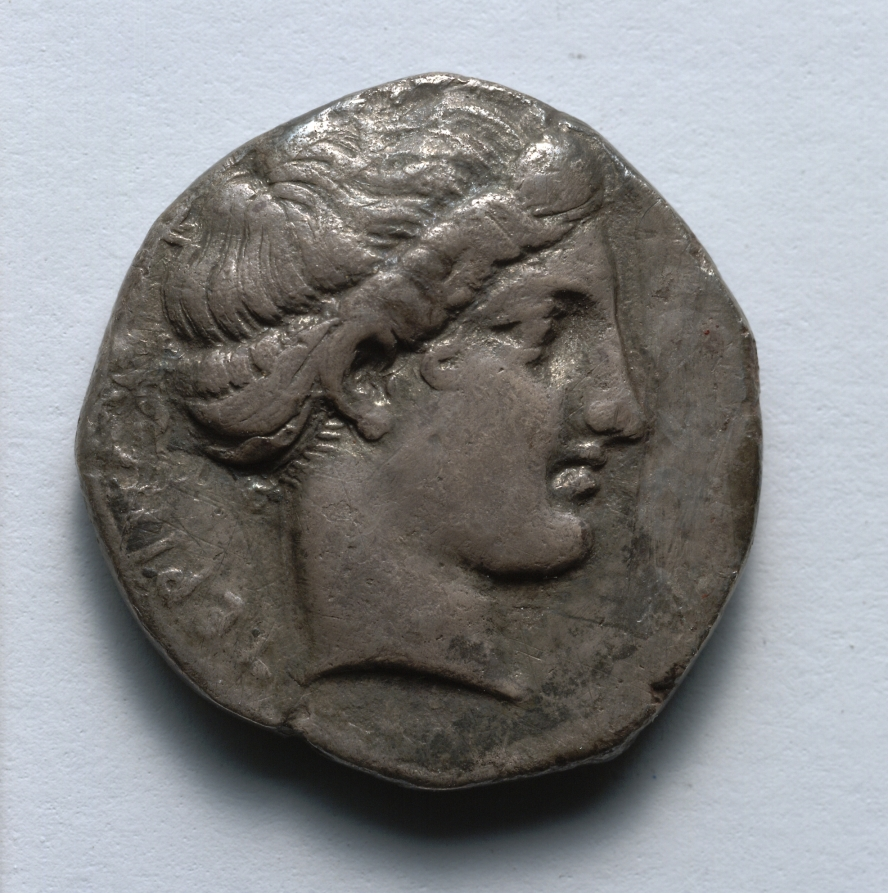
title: Stater: Head of Nymph (obverse)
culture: Greek, minted at Terina (South Italy)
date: c. 420–400 BCE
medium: silver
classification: Coins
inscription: ΤΕΡΙΝΑΟΝ